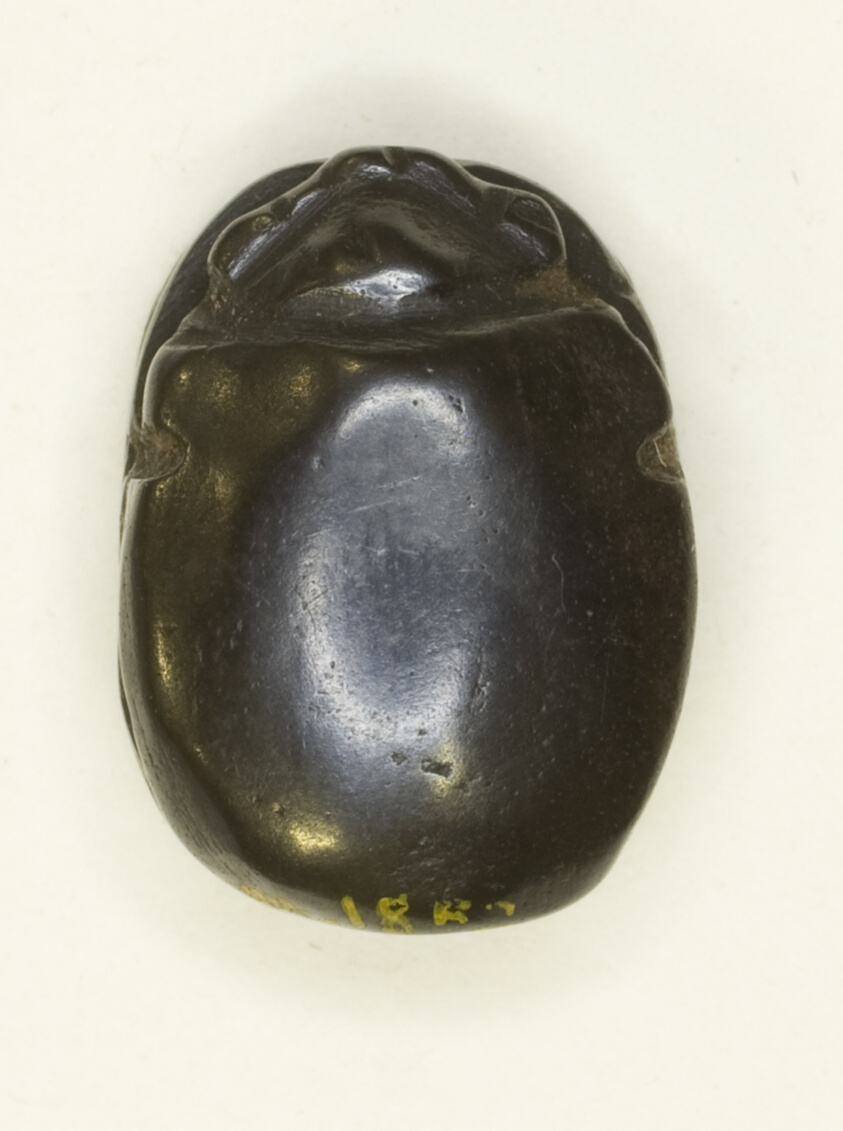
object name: Costume and Accessories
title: Scarab: Uninscribed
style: egyptian, third intermediate period, second intermediate period, new kingdom, late period (egyptian), ancient, middle kingdom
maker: Egyptian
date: Middle Kingdom–Late Period, Dynasties 12–26 (about 1985–525 BCE)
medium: Stone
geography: Egypt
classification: scarab; ancient art; costume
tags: scarab beetle, insects